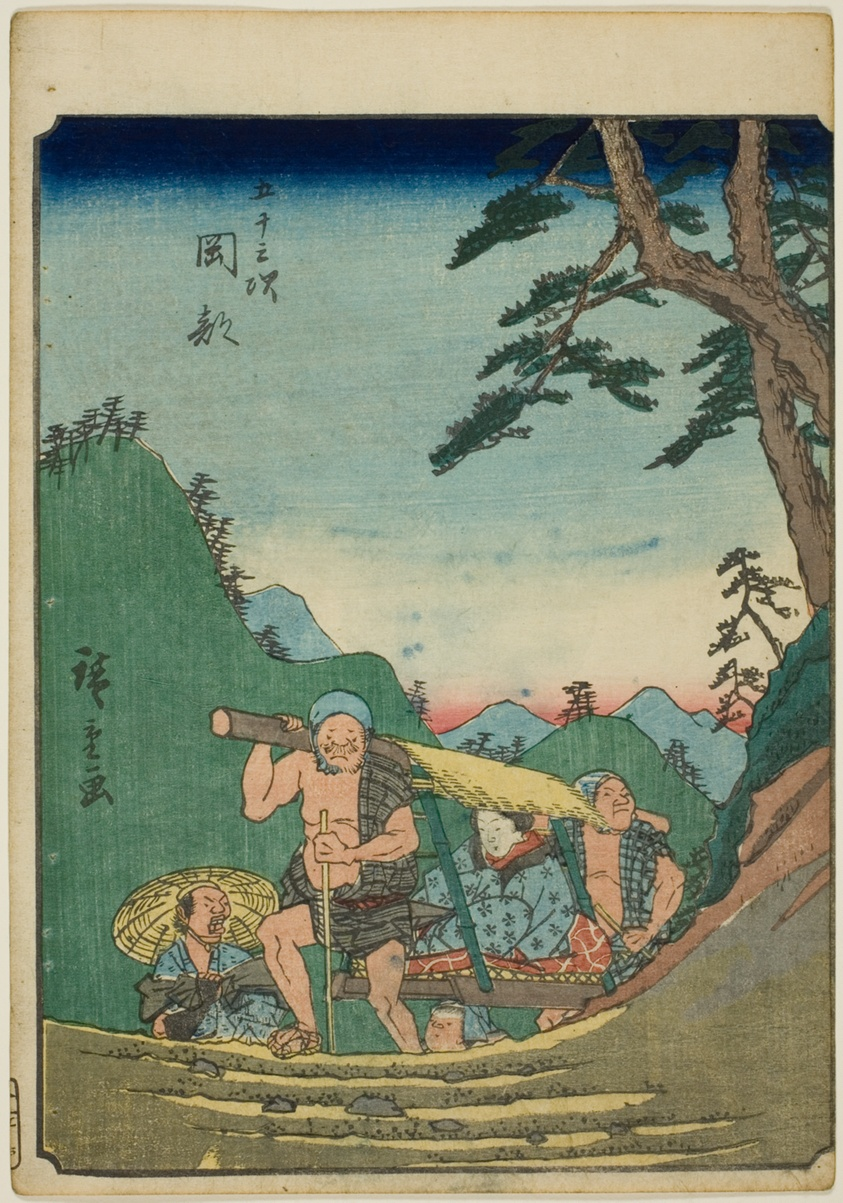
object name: Print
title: Okabe, from the series "Fifty-three Stations [of the Tokaido] (Gojusan tsugi)," also known as the Figure Tokaido (Jinbutsu Tokaido)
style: Japanese (culture or style)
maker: Utagawa Hiroshige 歌川 広重; Japanese, 1797-1858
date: 1852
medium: Color woodblock print; chuban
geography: Japan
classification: woodblock print; print